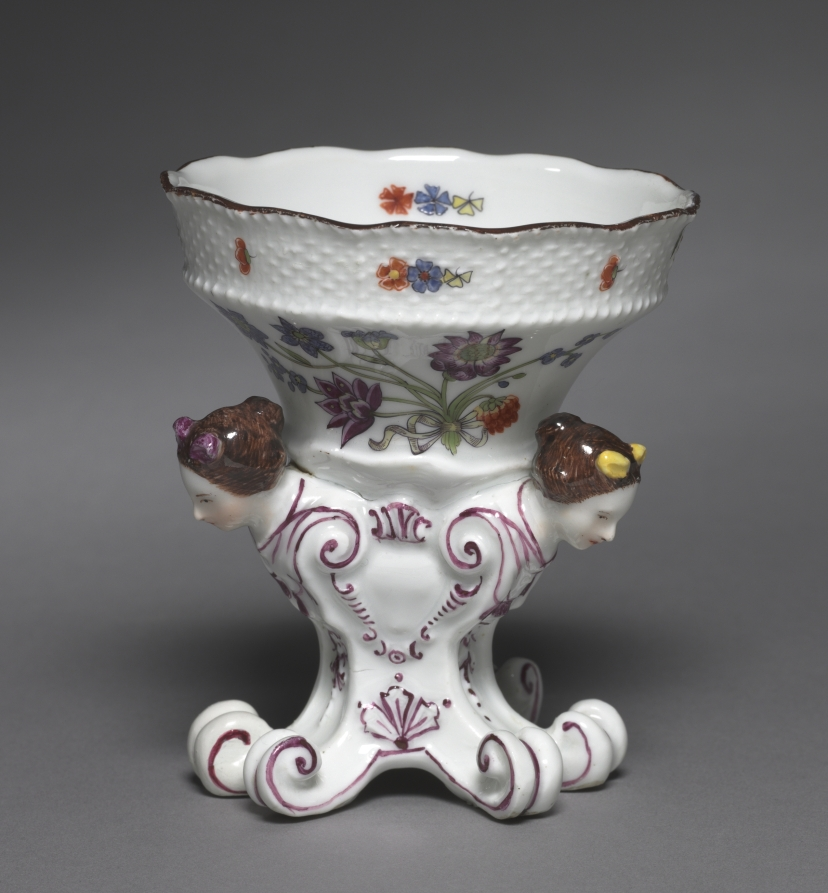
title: Salt Cellar from the Sulkowsky Service (2 of 2)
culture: Germany, Meissen, 18th century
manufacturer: Meissen Porcelain Factory (German, est. c. 1710)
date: 1735–1756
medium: hard-paste porcelain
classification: Ceramic